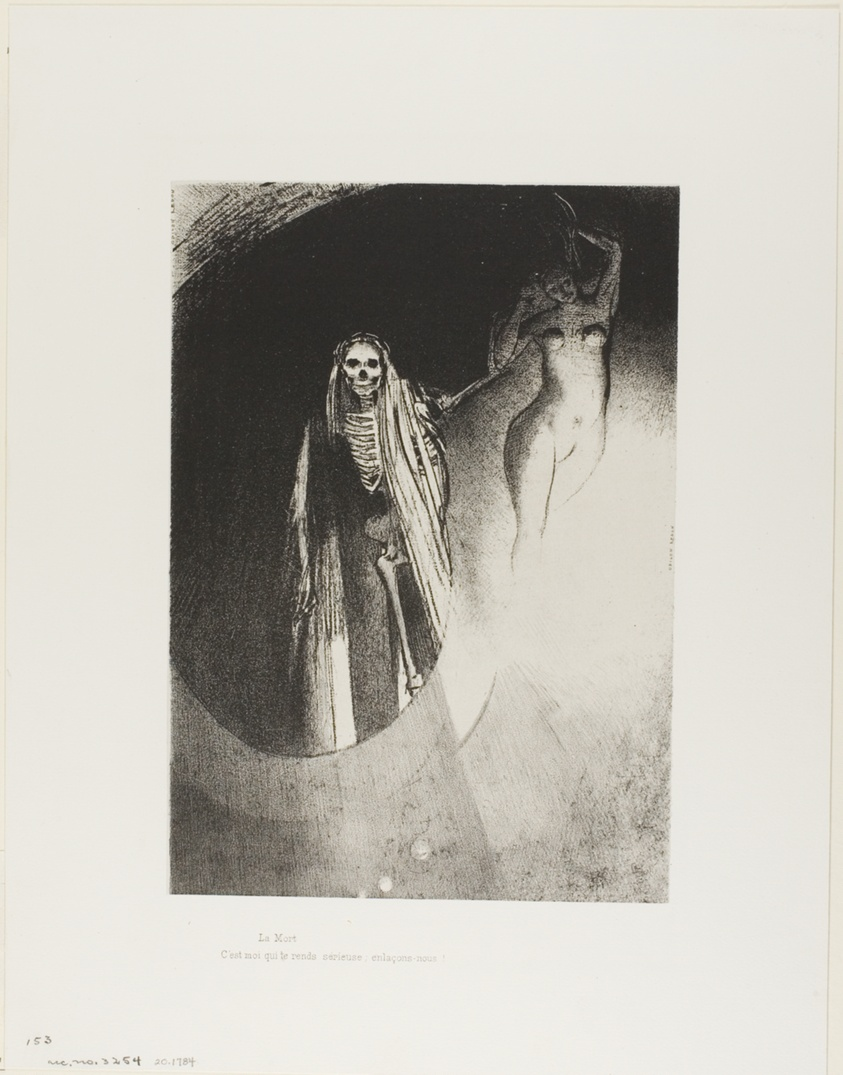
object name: Print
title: Death: "It is I who make you serious; let us embrace each other", plate 20 of 24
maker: Odilon Redon (French, 1840-1916)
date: 1896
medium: Lithograph in black on cream China paper laid down on ivory wove paper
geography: France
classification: lithograph; print; prints and drawing; paper